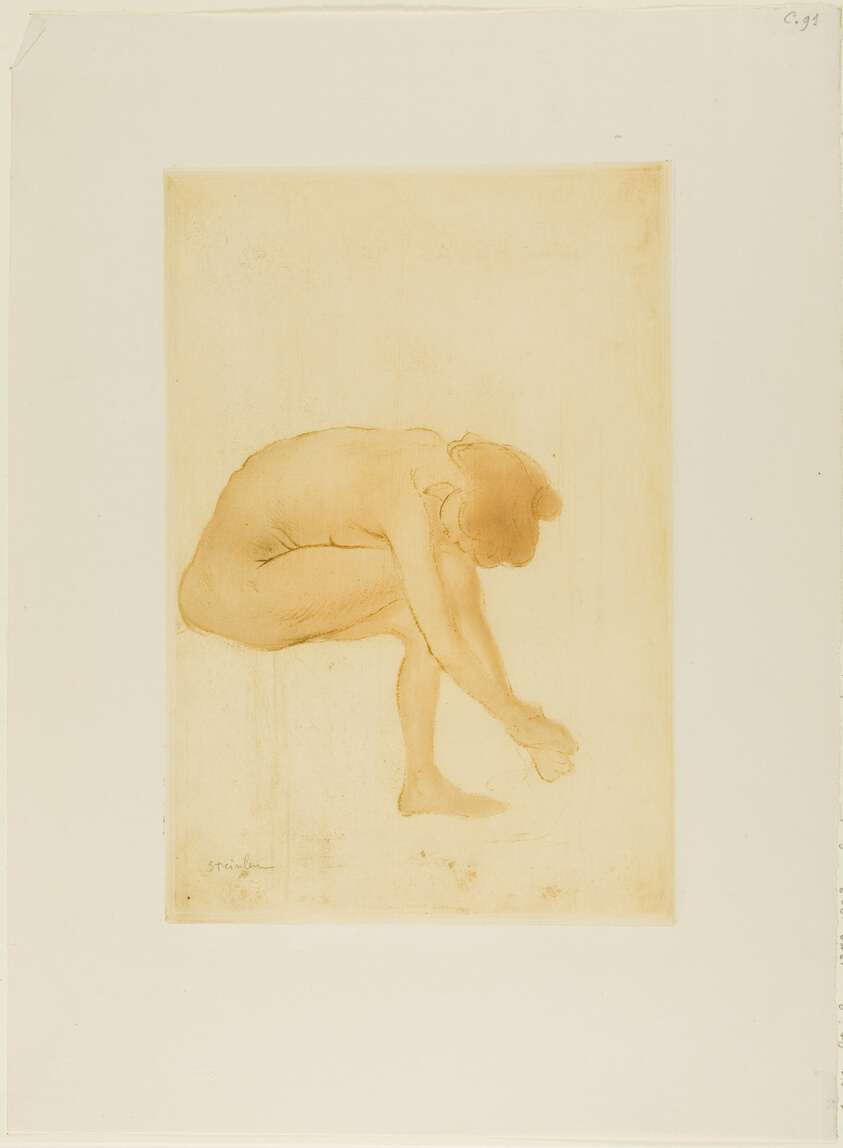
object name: Print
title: Seated Woman Drying Her Feet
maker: Théophile-Alexandre Steinlen; French, born Switzerland, 1859-1923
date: June 1902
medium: Soft ground etching and aquatint from a zinc plate in bistre (brown) on ivory wove paper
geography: France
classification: etching; print; prints and drawing